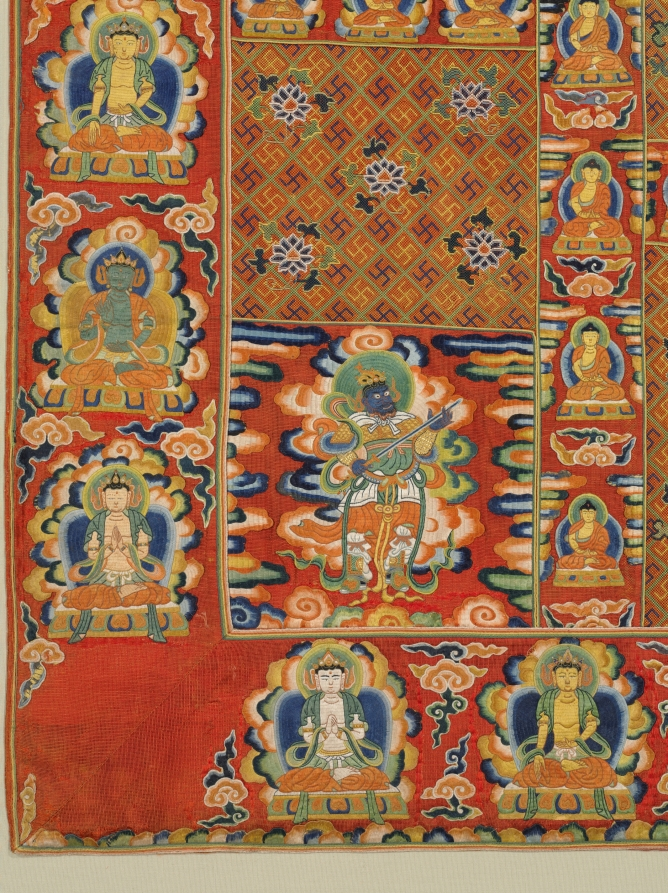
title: Buddhist Priest's Ceremonial Robe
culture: China, Ming dynasty (1368–1644)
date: 1400s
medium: silk and gold thread; embroidery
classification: Garment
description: This example of imperial embroidery is one of the earliest surviving Chinese Buddhist robes (kasaya) in the West. Depicting 991 Buddhas, each slightly different, it is constructed out of patches in reference to the legend in which the Buddha's favorite disciple divided a robe he was given into 30 pieces. Patchwork is also a sign of humility. Multiple Buddha images known as “thousand Buddha” designs are seen painted and sculpted on the walls of cave temples in India, Afghanistan, Central Asia, and China, but are rare on garments. The Four Heavenly Kings, guardians of the four directions, occupy the textile’s corners. When draped around the body, the inverted figures in the upper left corner appear right side up. Robes with 25 columns were worn by the highest-ranking clergy on ceremonial occasions.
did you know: The Five Transcendent Buddhas, who symbolize the purity of the five elements, are repeated around the edges.